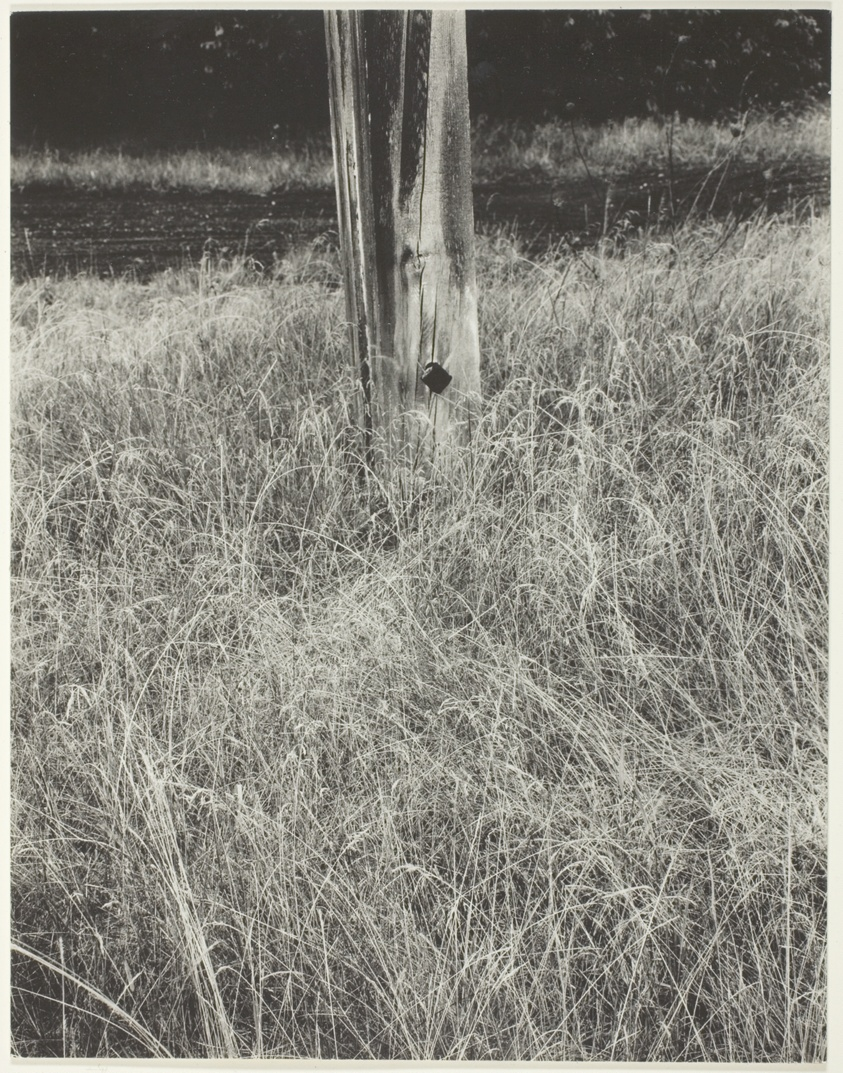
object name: Photograph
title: Grass and Flagpole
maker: Alfred Stieglitz (American, 1864–1946)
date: 1933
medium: Gelatin silver print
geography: United States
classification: gelatin silver (developing-out-paper) pr; photographic process; photography; photograph